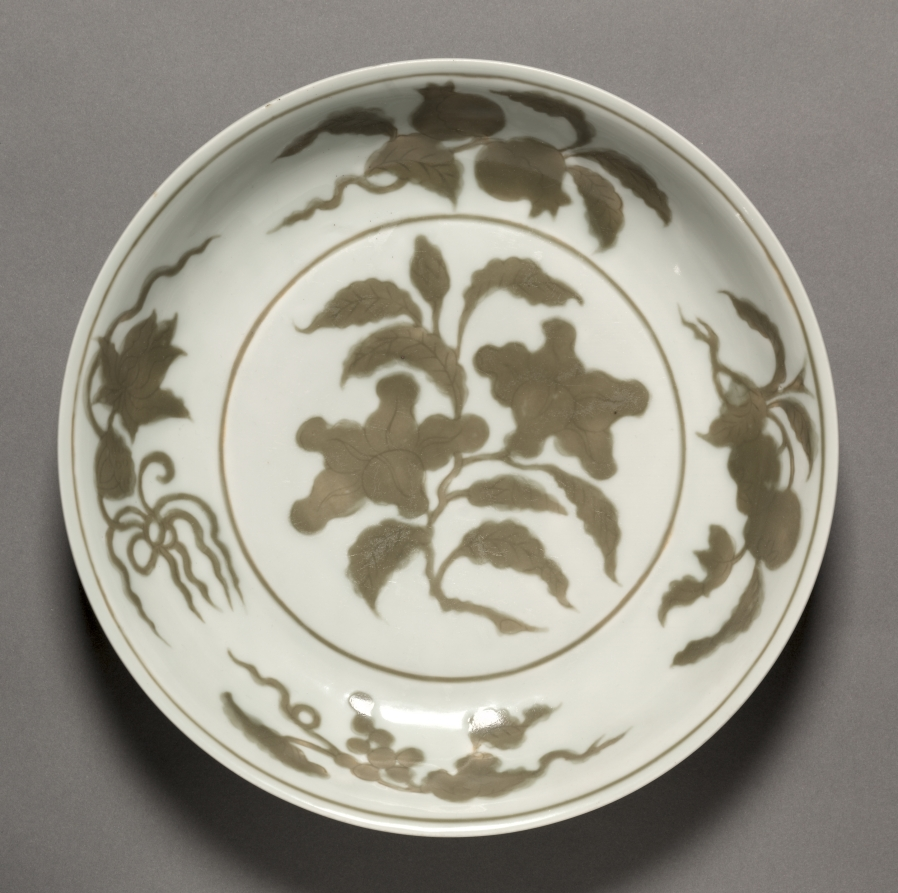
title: Dish with Spray of Gardenia amidst Pomegranate, Lotus, and Grapes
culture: China, Jiangxi province, Jingdezhen kilns, Ming dynasty (1368-1644), Hongzhi mark and reign (1488-1505)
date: 1488–1505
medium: porcelain with incised and underglaze coffee brown (iron oxide) decoration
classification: Ceramic